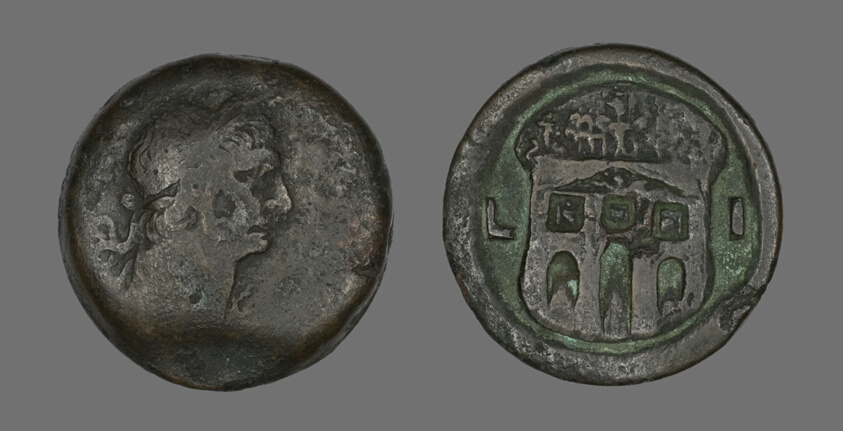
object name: Coin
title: Coin Portraying Emperor Trajan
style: roman period (egyptian), greco-roman (egyptian)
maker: Roman, minted in Alexandria, Egypt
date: 98-117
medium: Bronze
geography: Egypt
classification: coin; ancient art